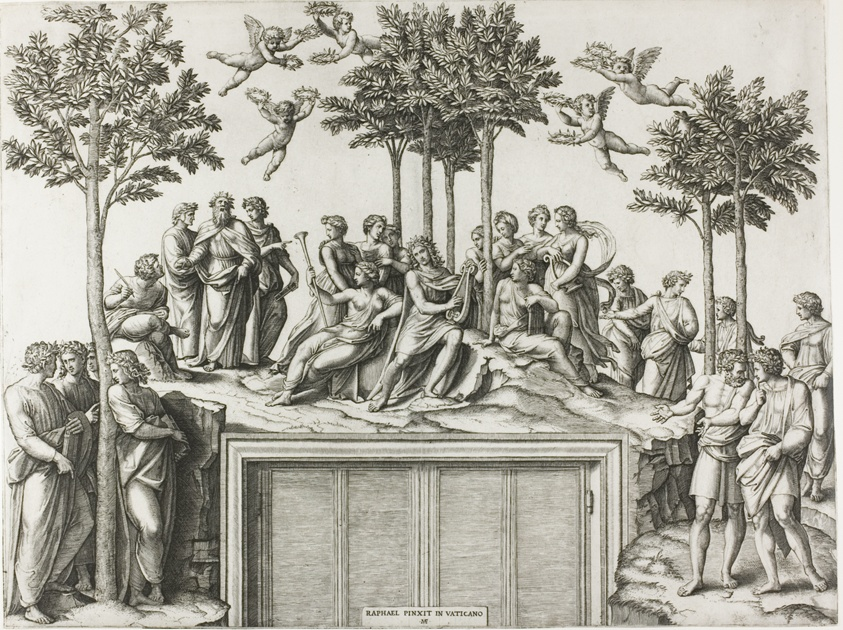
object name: Print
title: Apollo on Parnassus, Surrounded by the Muses and Poets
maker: Marcantonio Raimondi (Italian, c. 1480-1534); after Raffaello Sanzio, called Raphael (Italian, 1483-1520)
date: 1517/20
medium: Engraving in black on ivory laid paper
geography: Italy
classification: engraving; print; prints and drawing